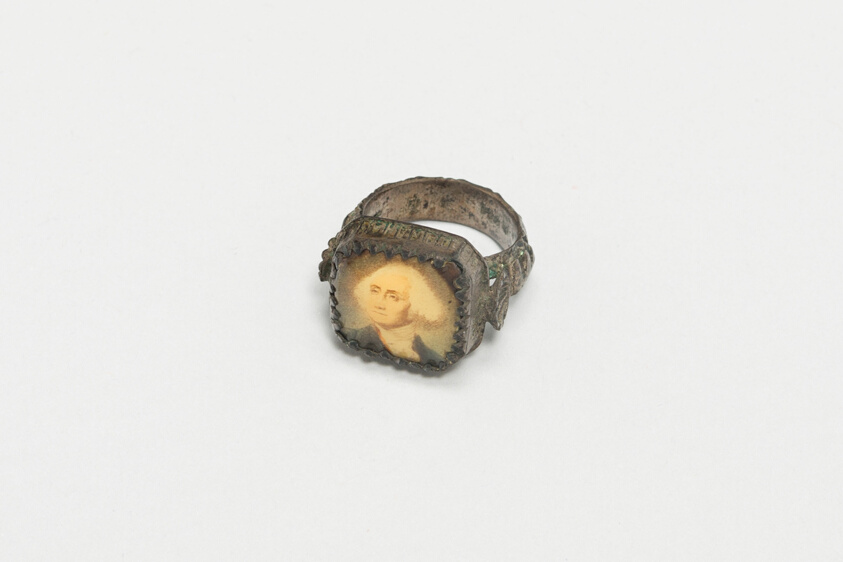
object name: Decorative Arts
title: Ring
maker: Artist unknown (American, 19th century)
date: 1800–1900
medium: Gold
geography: United States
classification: ring (jewelry); jewelry; american decorative arts; american arts; decorative arts